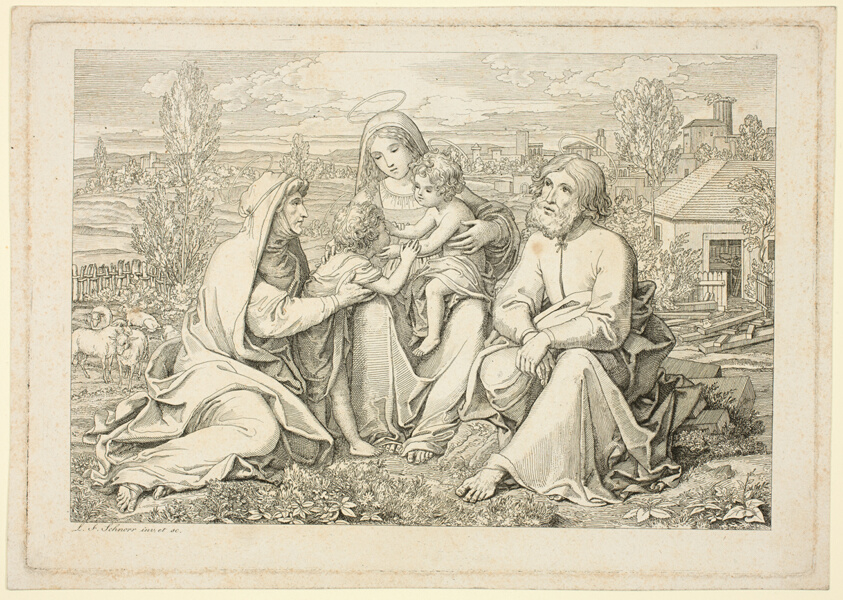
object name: Print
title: The Holy Family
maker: Ludwig Ferdinand Schnorr von Carolsfeld (German, 1788-1853)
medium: Etching on ivory wove paper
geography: Germany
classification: etching; print; prints and drawing